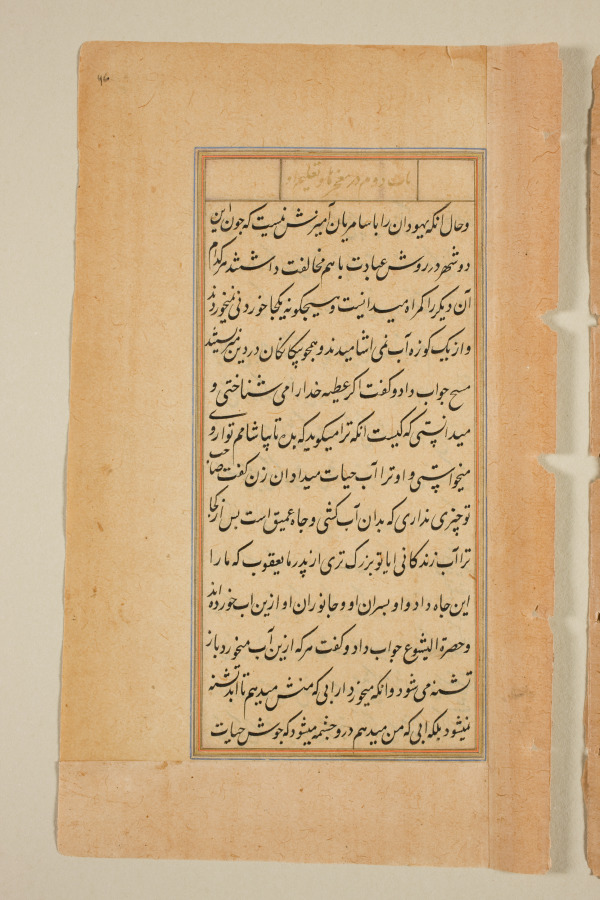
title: Text page from a Mirror of Holiness (Mir’at al-quds) of Father Jerome Xavier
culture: Mughal India, Allahabad, made for Prince Salim (1569–1627)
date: 1602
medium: Ink and gold on paper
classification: Manuscript